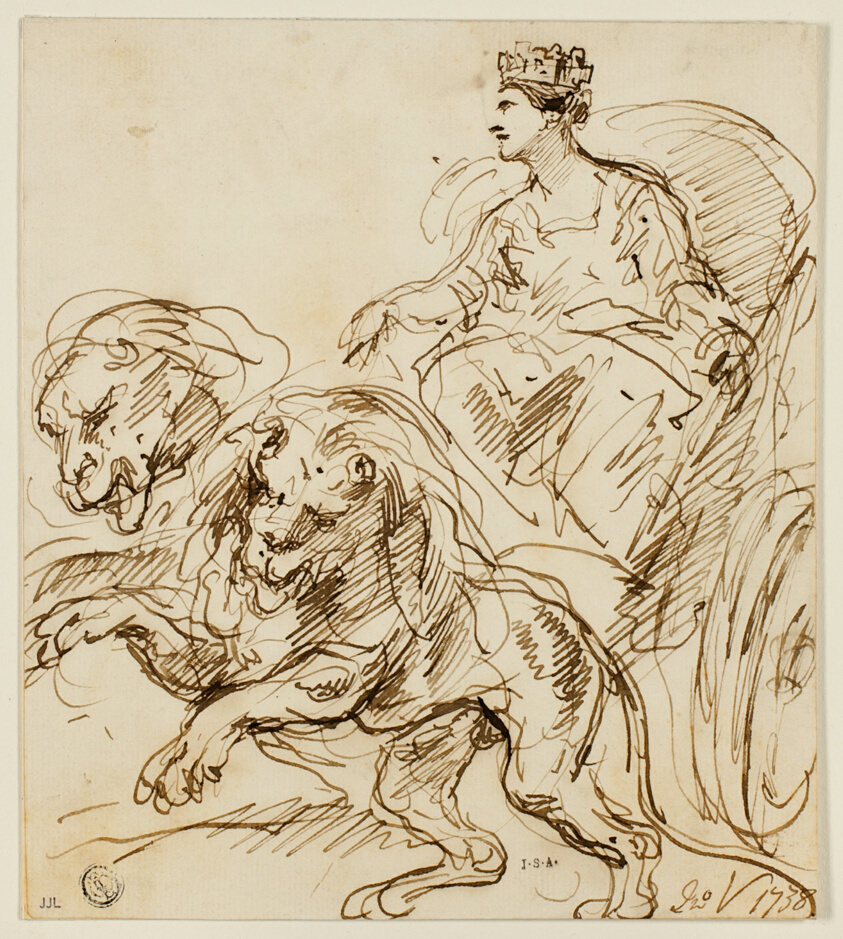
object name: Drawing and Watercolor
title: Cybele on Chariot Drawn by Lions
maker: John Vanderbank (English, 1686-1739)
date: 1738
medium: Pen and brown ink, on cream laid paper, laid down on card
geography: England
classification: pen and ink drawings; drawings (visual works); prints and drawing